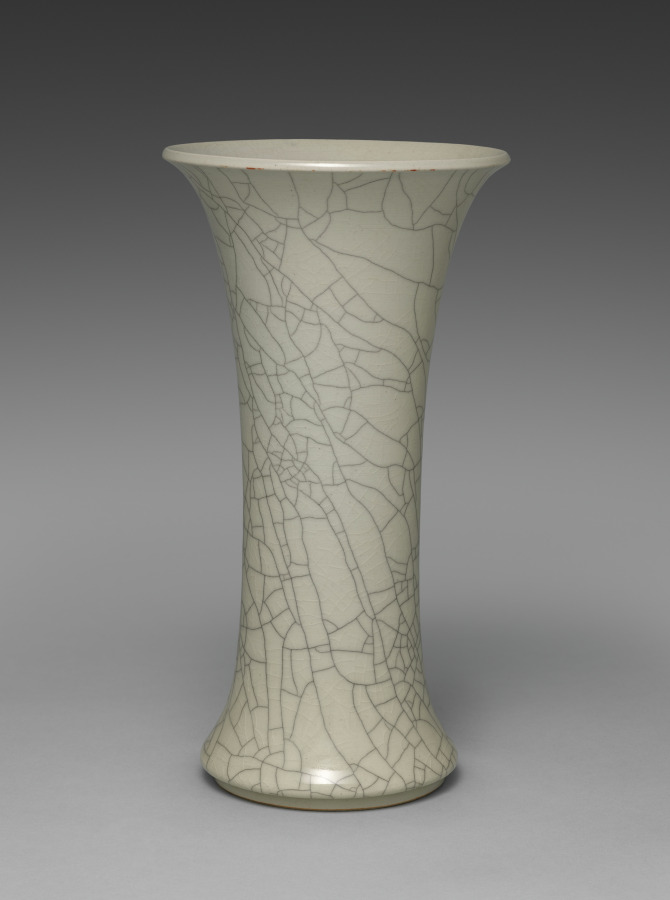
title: Gu-shaped Vase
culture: Japan, Meiji period (1868–1912)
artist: Seifū Yohei III (Japanese, 1851–1914)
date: 1912–14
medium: Porcelain with crackled glaze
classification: Ceramic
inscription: 清風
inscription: 清風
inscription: 帝室技芸員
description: Seifū Yohei III mined the repertoire of Chinese vessel types, from ceramics modeled after ancient ritual bronzes to shapes developed in the Yuan (1279–1368) and Ming (1368–1644) dynasties. His designs tended to be formal and restrained, often featuring creamy white glazes suggestive of the hue of Ding ware and green glazes resembling Longquan ware. This gu-shaped vase has a cracked-ice glaze, which was once customarily called Ge (Japanese pronunciation Ka), after the kiln where it purportedly originated during the Southern Song dynasty (1127–1279). The glaze’s double-crackle pattern, featuring both deeper and shallower cracks, is called “gold threads and iron lines.” The effect was enhanced here by coating the vessel with ink or another stain, which was allowed to seep into the cracks before the surface was wiped clean.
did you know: Gu-shaped vases are relatively slender cylinders that flare at both the mouth and foot with orbs or drumlike forms partway up the vessel.